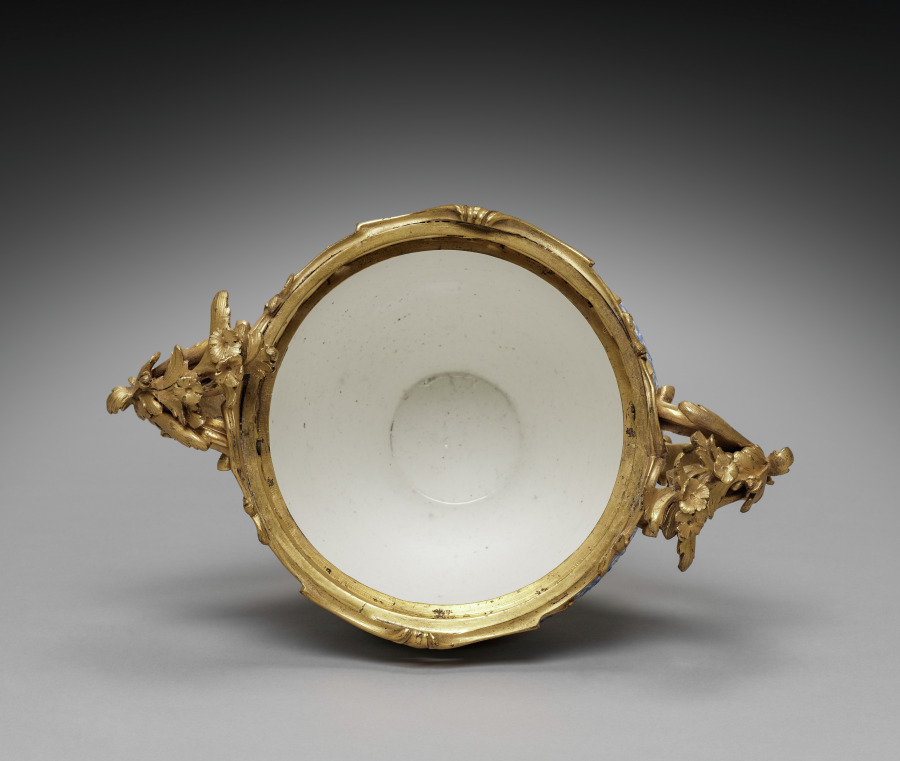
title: Vase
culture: Germany, 18th century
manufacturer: Meissen Porcelain Factory (German, est. c. 1710)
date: 1749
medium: porcelain mounted in gilt bronze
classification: Ceramic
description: One of these vases is dated 1749. They were perhaps part of a set of four covered vases that we know from documents were acquired by Mme. de Pompadour, mistress of Louis XV in 1752.